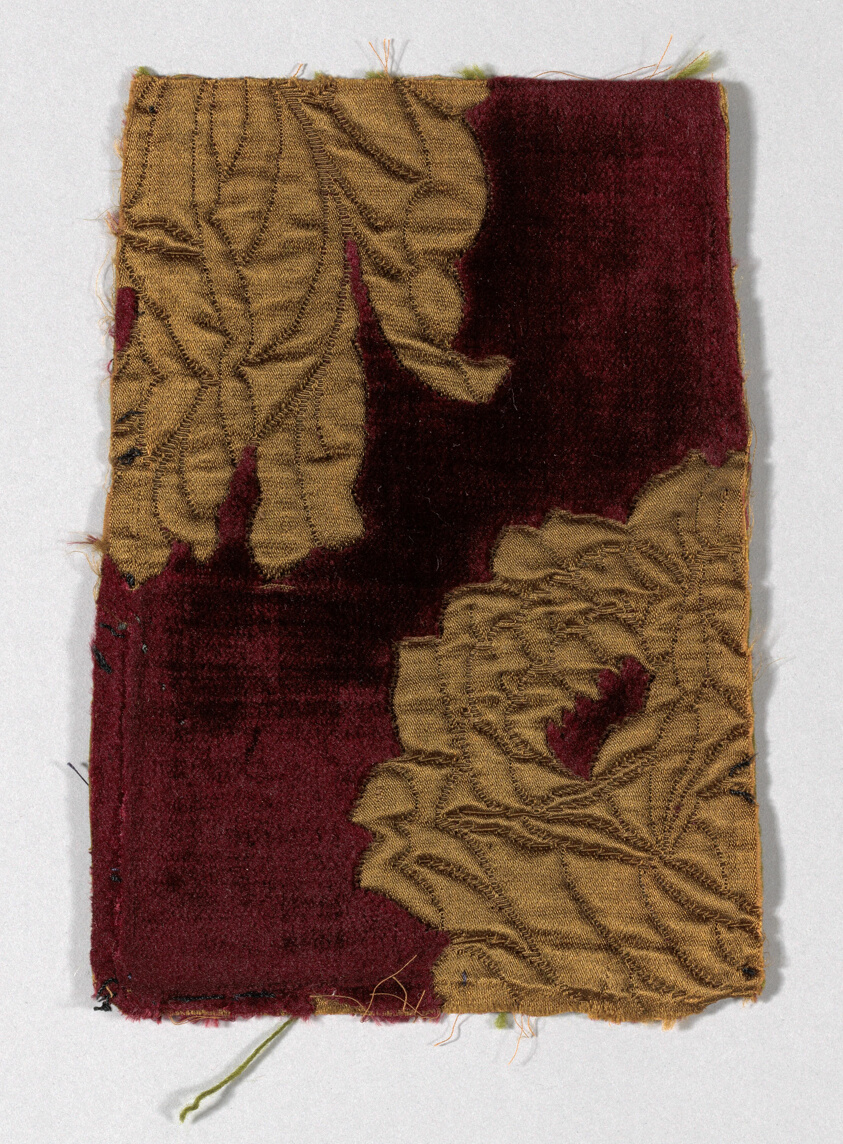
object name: Textile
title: Matelasse (pieces from dress 1923.1639a)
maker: France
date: c. 1885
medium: Garnet velvet with moss green satin allover design of single large roses. Velvet, satin and wool. Matelasse is Jacquard figured fabric of heavy compound weave having raised pattern as if quilted or wadded. It was made of all materials or combinations of materials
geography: France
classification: textile; weaving; costume - weaving; weaving - velvet; costume